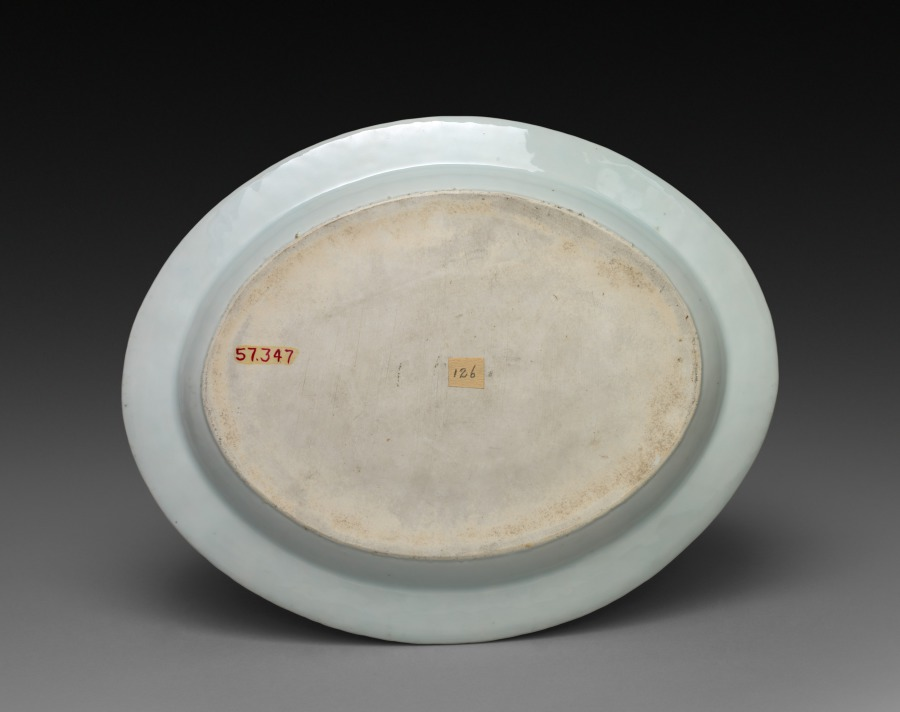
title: Platter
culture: China, Chinese Export, 18th century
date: 1783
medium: porcelain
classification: Ceramic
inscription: on the badge of the Order of Saint Patrick, above: "QUIS SEPARABIT, MDCCLXXXIII"; the central motif consists of the same badge as above flanked by winged dragons, and below, a ribbon with the inscription: "DEODUCE FERRO COMITANTE."